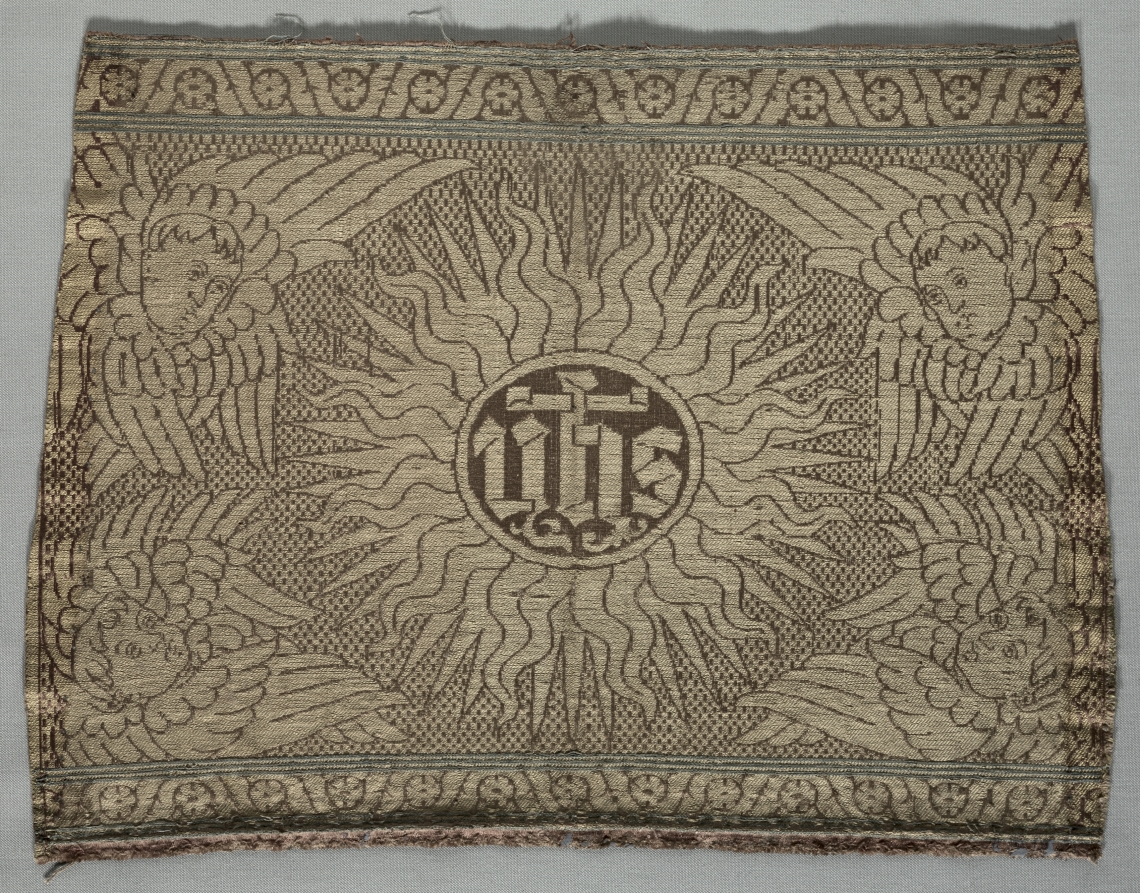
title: Band for Dalmatic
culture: Italy, 16th century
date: 1500s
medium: brocade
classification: Textile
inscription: "I H S."